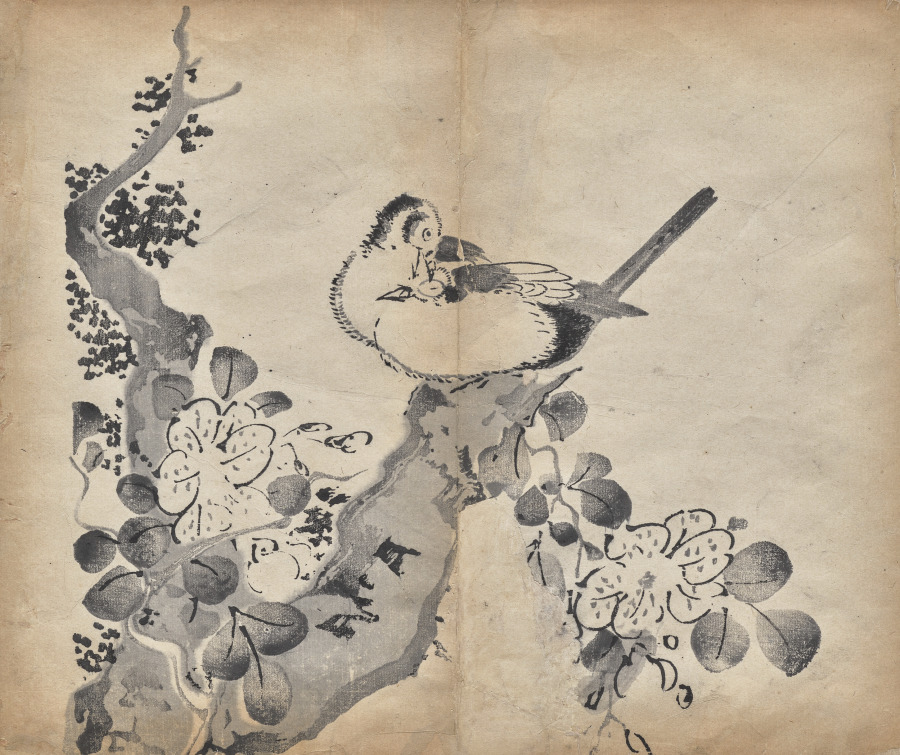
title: Blossoms and Birds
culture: China, Ming dynasty (1368–1644)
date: 1625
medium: color woodblock print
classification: Print